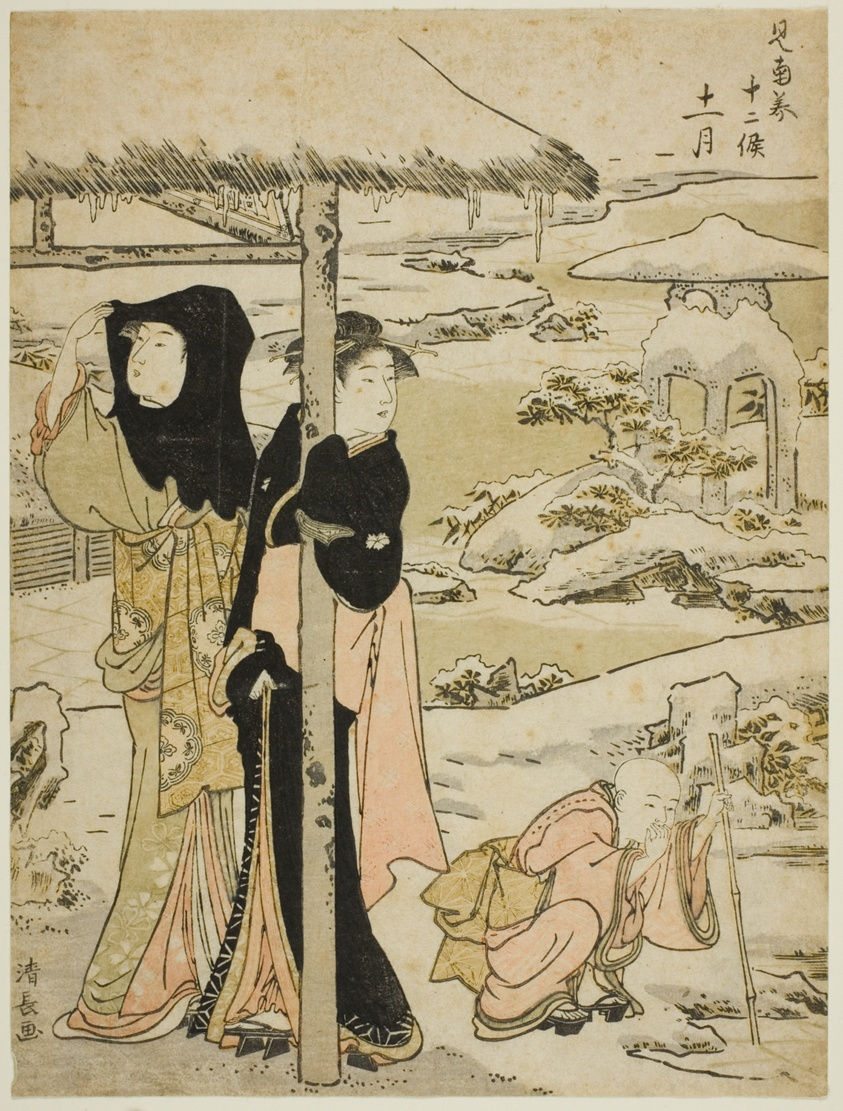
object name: Print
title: The Eleventh Month (Juichigatsu), from the series "Twelve Months in the South (Minami juni ko)"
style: Japanese (culture or style)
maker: Torii Kiyonaga (Japanese, 1752-1815)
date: c. 1783/84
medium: Color woodblock print; chuban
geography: Japan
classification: woodblock print; print; asian art